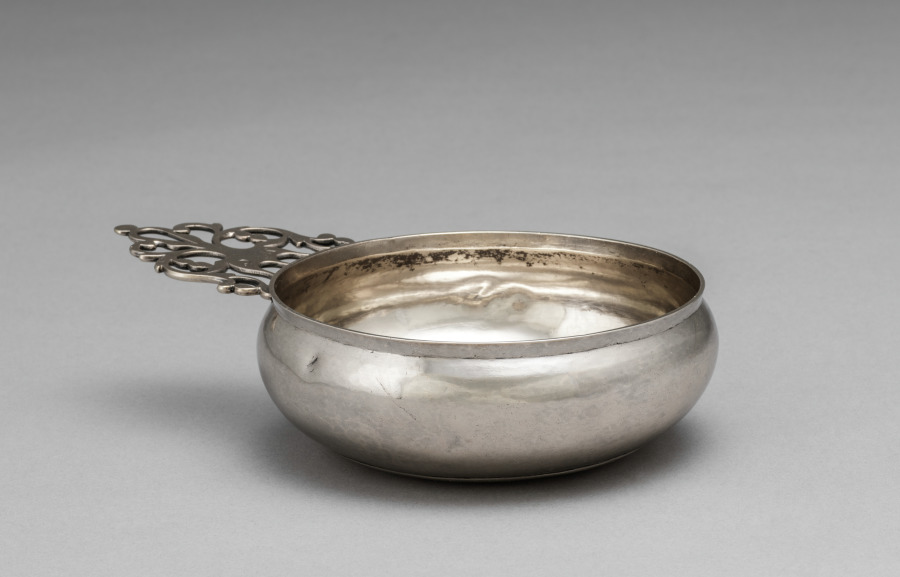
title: Porringer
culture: America, Massachusetts, Boston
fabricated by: Andrew Tyler (American, 1692–1741)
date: c. 1725–30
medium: silver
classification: Silver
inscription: engraved "MC" in block letters on top of handle (facing away from bowl). Scratched underneath handle: "8..12."